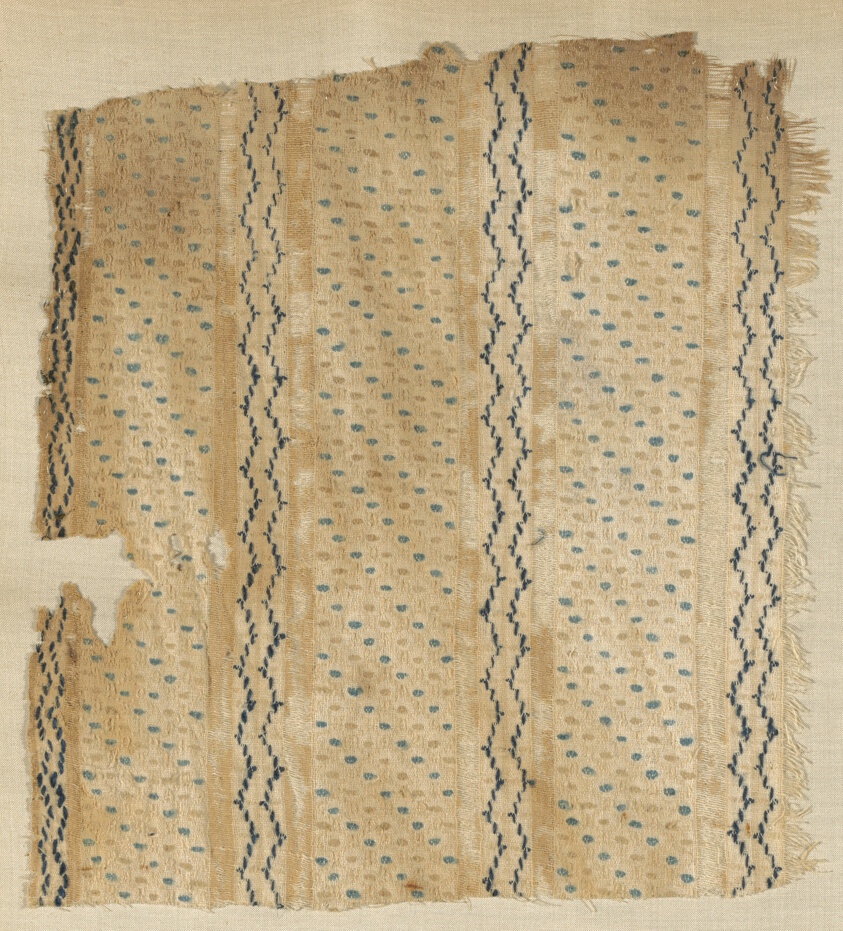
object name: Textile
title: Fragment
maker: Egypt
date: Arab period (641–969)/Fatimid period (969–1171)/Ayyubid period (1171–1250)/ Mamluk period (1250–1517), 10th/13th century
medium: Linen, compound weave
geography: Egypt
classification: textile; weaving